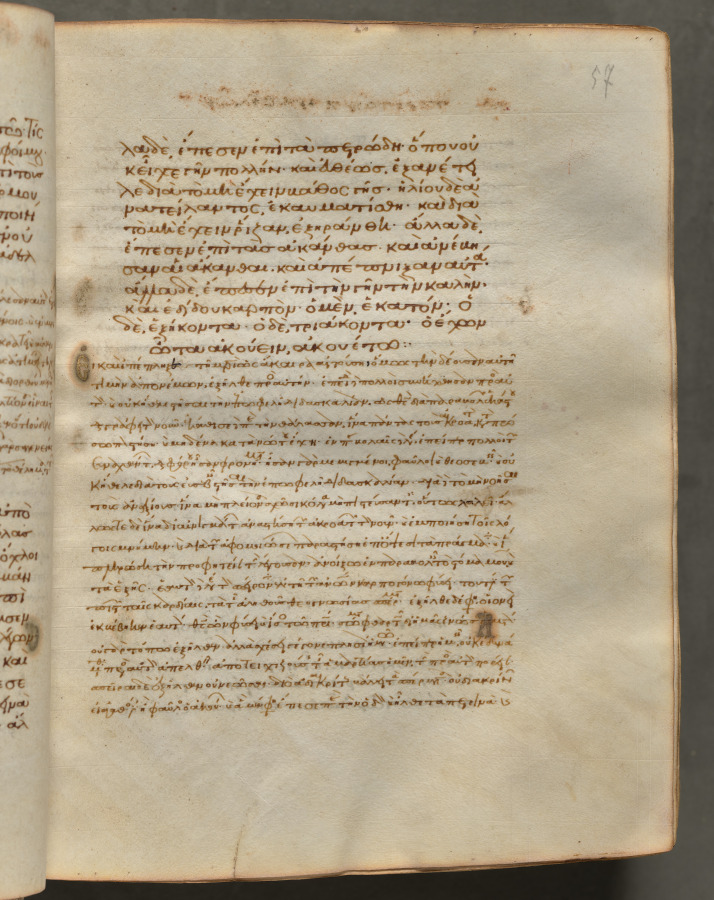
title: Text, folio 57 (recto), from a Gospel Book with Commentaries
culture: Byzantium, Constantinople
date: c. 1000–1100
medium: ink, tempera, and gold on vellum; leather binding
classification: Bound Volume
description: Each of the four gospels in this book opens on a page with brilliantly illuminated borders depicting the author of the text as well as birds-principally peacocks, symbols of the immortality of the soul-and fountains, representing the fountain of life and the salvation of the soul. This volume consists of 428 leaves with texts in Greek. Its level of sophistication suggests that it was probably written and decorated in a monastery in Constantinople.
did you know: Gospel Books were carried in procession through Byzantine churches.